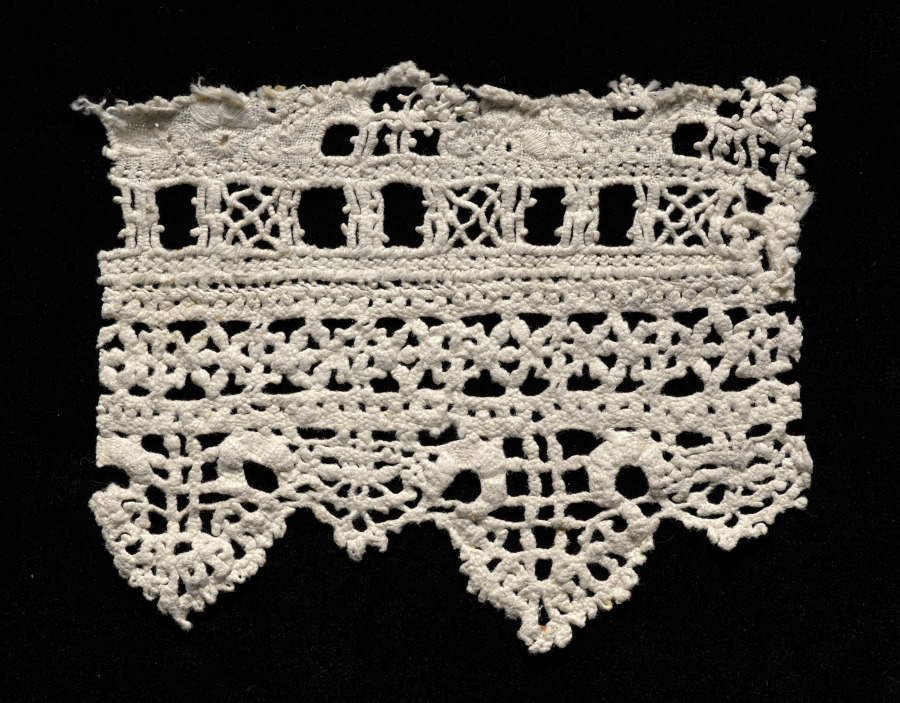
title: Lace Fragment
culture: Italy, Genoa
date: 1600s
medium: Linen: needle lace (reticella and cutwork) and bobbin lace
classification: Lace